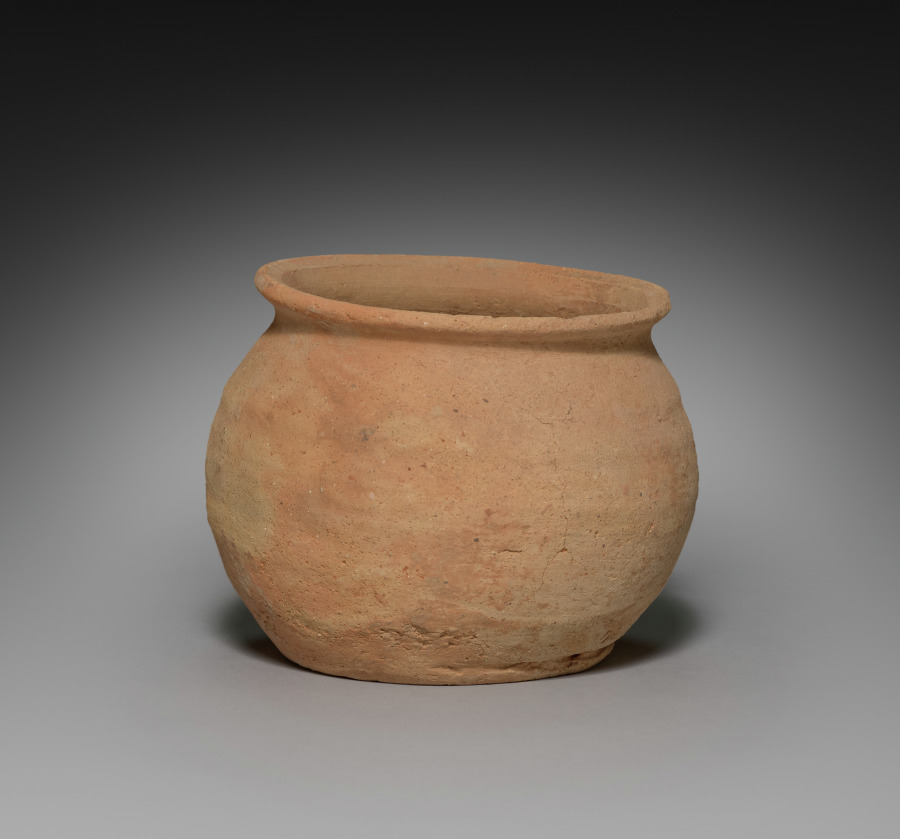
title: Covered Jar with Horn Handle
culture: Korea, Silla (57 BC-935) or Kaya (AD 42-562) period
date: 400s–500s CE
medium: red earthenware with applied red slip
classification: Ceramic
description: Early earthenware from the Three Kingdoms period (57 BCE–668) became widely utilized as agriculture and religion grew to be essential elements in sustaining society and its systems. The clay jars of different sizes and shapes on display were made for the following purposes: some were used to store harvested grains and seeds, some, especially lidded ones such as this example, to preserve cremated remains, and some to serve offerings in rituals.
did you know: Closed kilns built on hillsides became widely used for producing this type of pottery vessel in Korea during the Three Kingdoms period.